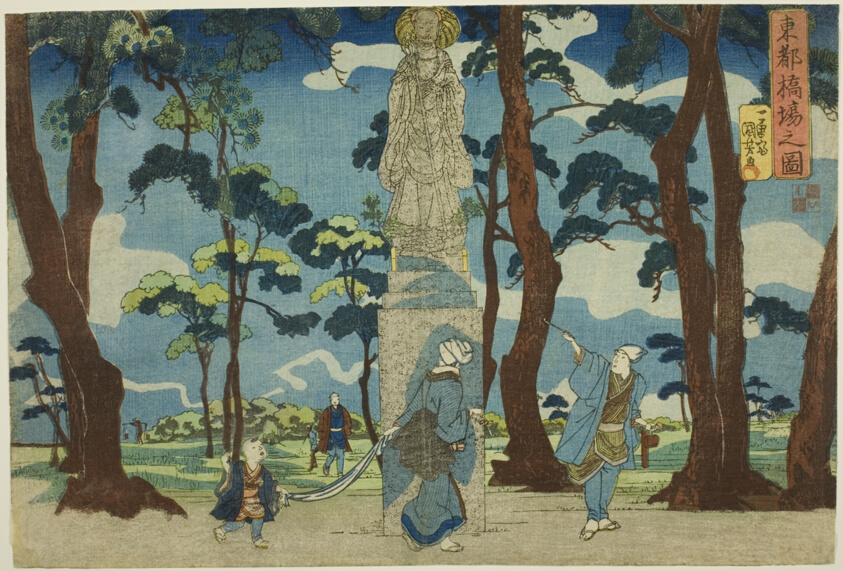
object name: Print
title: View of Hashiba in the Eastern Capital (Toto Hashiba no zu), from the series "Views of the Eastern Capital (Toto no zu)"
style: Japanese (culture or style)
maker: Utagawa Kuniyoshi (Japanese, 1797-1861)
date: early 1830s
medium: Color woodblock print; oban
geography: Japan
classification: woodblock print; print; asian art